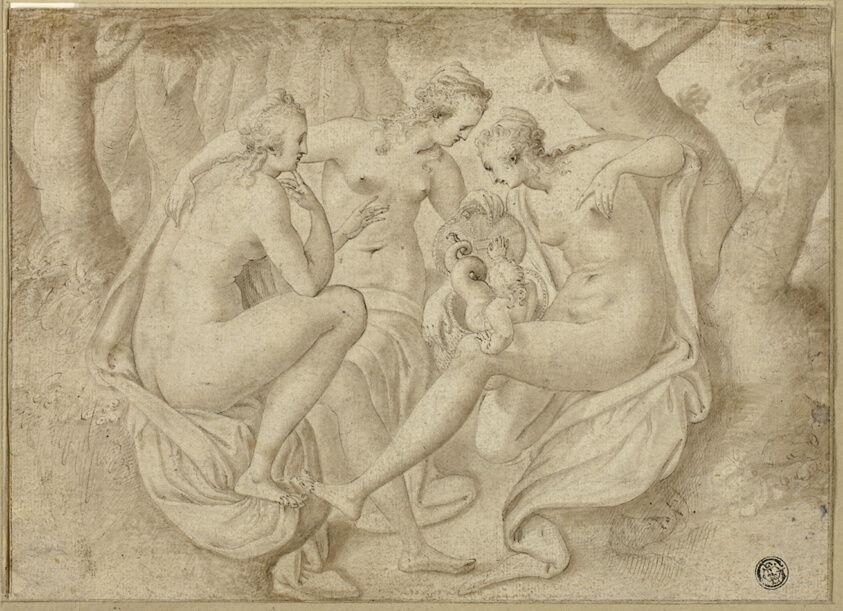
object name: Drawing and Watercolor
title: Cecrops' Daughters Uncover Erichthonius (recto); A Battle Scene (verso)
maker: Anthonie van Montfoort Blocklandt (Netherlandish, 1532-1583)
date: 1577/78 (recto); n.d. (verso)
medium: Pen and brown ink with brush and brown wash (recto and verso), on ivory laid paper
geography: Netherlands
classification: ink or chalk wash; drawings (visual works); prints and drawing